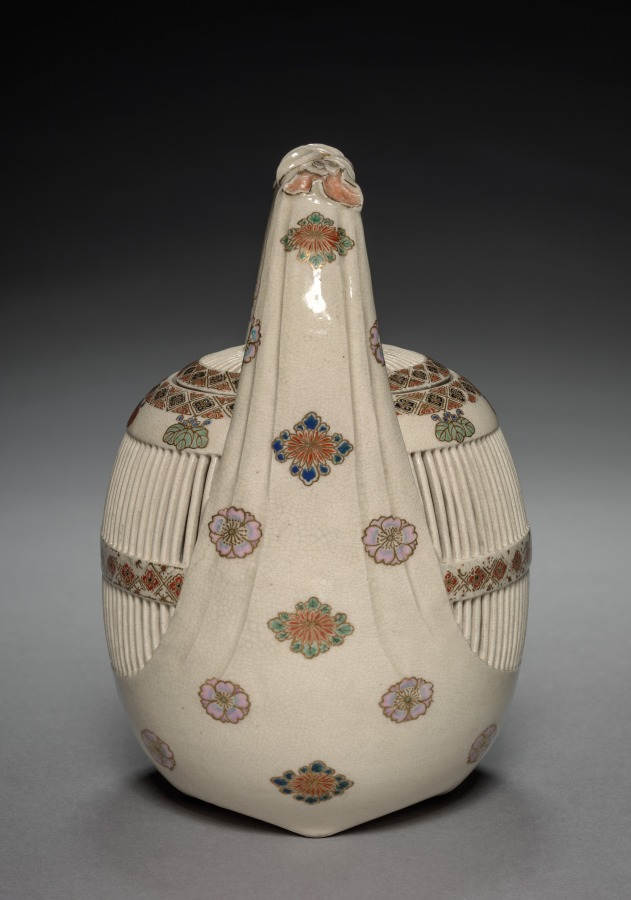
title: Jar: Satsuma Ware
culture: Japan, Edo period (1615–1868)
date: early to mid-1800s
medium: pottery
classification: Ceramic